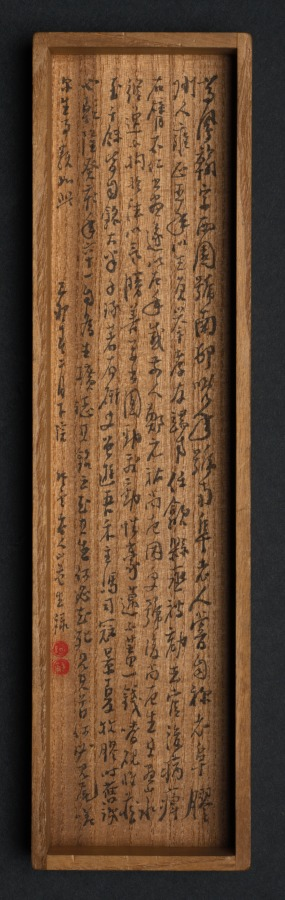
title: Plum Blossoms and Peonies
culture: China, Qing dynasty (1644-1911)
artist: Gao Fenghan (Chinese, 1683–1749)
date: 1741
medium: handscroll, ink on paper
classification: Painting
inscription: Artist's 2 inscriptions and 9 seals (the painting of Peonies with the artist's colophon and the colophon by Hou Chia-fan are on a single sheet of paper). Artist's inscription and 2 seals (Plum Blossoms): [seal] Ts'ai-yün. After finishing writing my colophon, I unrolled the painting to take another look, and it now seems that the composition here should have moved to the later part of the scroll. If that is the case, then the "Cool Beauty" [prunus] of the Solitary Hill is after all unable to take precedence over the "King of Flowers" [peony]. A laugh. Lao-fou inscribed. [seal] Feng-han. Artist's colophon (Plum Blossoms): [3 seals] Tun; Yen-yün-kung-yang, Hou-shang-tso-sheng. A few days after I painted this scroll for Shui- hsien [Yüeh Meng-yüan], the plum blossoms were in full bloom at his residence. He invited me over to enjoy them together for a long while, and I composed two additional poems and wrote them down here for his criticism. [Poems on the colophon are not translated.] First month, twenty-first day, your junior, Kao Feng-han of Nan-fou drafted this with the left hand. [seal] Feng-han. Artist's inscription and 4 seals (Peonies): Brushed with the left hand in the hsin-yu year [1741]. [seal] Yu-hsi. [3 seals at end of painting] Hou-shang-tso-sheng; Yen-yün-kung-yang; Shih-tsao-wu. Artist's colophon and seal (Peonies): The imperial concubine from the Yang family loved to dress in red, And from the emperor won the title of Hai-t'ang. But ever since she became the new dream of the moon palace, She changed into rainbow colors, while learning to dance. After I wrote the poem on Looking for Plum Blossoms in the Teng-wei Mountains, I attached to it a few branches of prunus, some bamboo tips and a piece of rock, with a scattering of green [moss] here and there to fill up the scroll. Unexpectedly, my playful fascination [with these subjects] was still not quite satisfied, so I made up these amorous ideas and romantic images [of the peony], to follow the footsteps of the fair lady of the Ku-hsieh Mountain [prunus]. Furthermore, I picked out one poem to be my vanguard. Perhaps such luminosity of wealth and power will be enough to overwhelm the poor fellows, and [they] will not mind the comparatively short length [of paper] assigned to it. Amusingly inscribed. Please correct me again. To Shui-hsien, my learned senior, your junior Han inscribed again. [seal] Tso-hua [left-handed painting]. 1 additional colophon and 5 additional seals: 1 colophon, dated 1742, and 3 seals of Hou Chia-fan (act. ca. 1742); 1 seal of P'u Ch'üan (20th c.?); 1 seal of Li family (dates unknown).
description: One of the so-called Yangzhou Eccentrics (a group of painters who lived in Yangzhou and were known for their unorthodox art and lifestyle), Gao Fenghan depicts China’s two most loved flowers in full bloom—the “cold beauty,” or plum blossom, in the first section, and the “king of flowers,” or peony, in the second section. Painted in 1741, the year when Gao decided to leave the south and return home to Shandong province in eastern China, this work was likely a token of farewell. His casual brushwork may indicate his mental and physical struggle at the time. After having crippled his right hand in 1737, Gao used his left hand to paint and achieved a crudeness and eccentric style unattainable before.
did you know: In East Asian art, peonies traditionally symbolize prosperity and wealth.